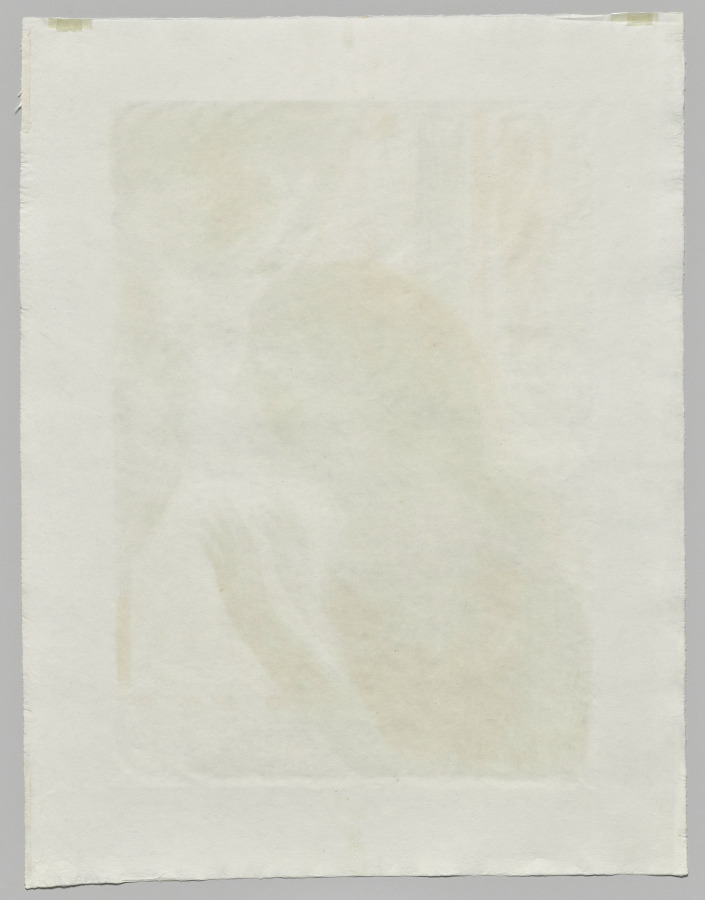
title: It Was a Religious Mystery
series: Love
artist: Maurice Denis (French, 1870–1943)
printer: August Clot (French, 1858–1936)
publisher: Ambroise Vollard (French, 1867–1939)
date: 1899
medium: color lithograph on wove paper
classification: Print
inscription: Recto, lower right: “Ce fut un religieux mystère”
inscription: In graphite, recto, lower right: “Maurice Denis (signed)”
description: Maurice Denis belonged to the Nabis, a group of artists who came together in 1889 to pursue a radical new style informed by subjective experience and emotion. This print is from a series in which Denis explored his devotion to his wife, Marthe, by depicting her in a variety of settings alongside titles drawn from his own journal. The vague but evocative images were meant to encourage the viewer to draw connections to the theme and meditate on its meaning.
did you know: Maurice Denis was a devout Catholic and often drew visual connections between his wife, Marthe, the subject of this print series, and the Virgin Mary.